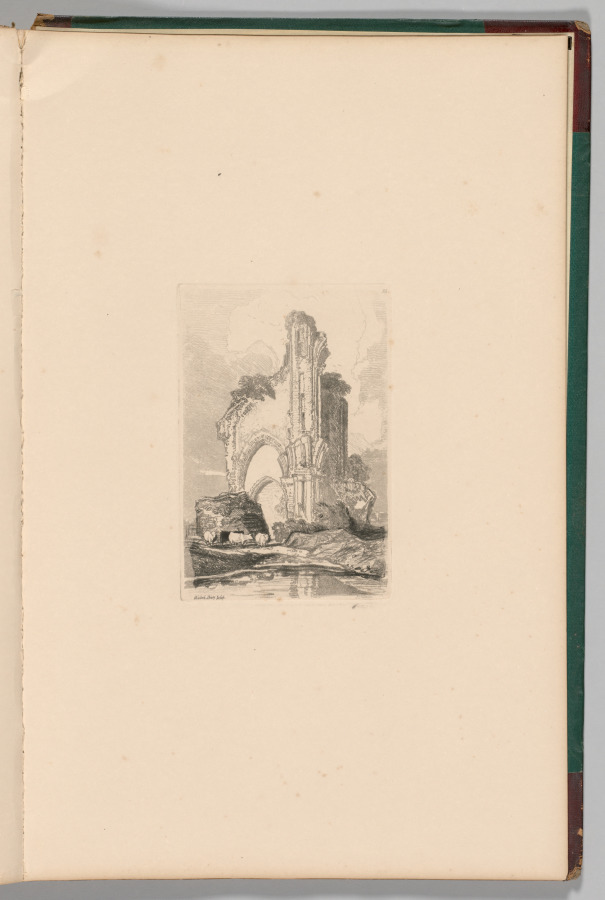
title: Liber Studiorum: Plate 35, Wenlock Priory, Salop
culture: England, 19th century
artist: John Sell Cotman (British, 1782–1842)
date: 1838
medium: softground etching, from a bound volume containing 48 plates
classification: Bound Volume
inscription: In plate, within image, upper right: 35; in plate, below image, lower left: Wenlock Priory Salop.; in plate, below image, lower right: JS Cotman.